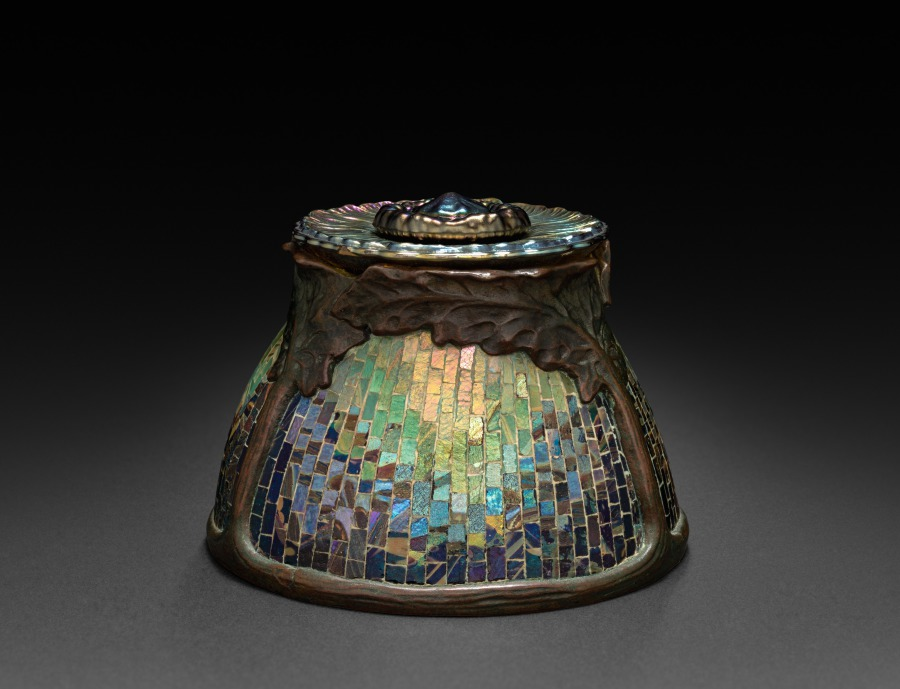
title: Poppy Inkwell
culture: America, New York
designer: attributed to Clara Wolcott Driscoll (American, 1861–1944)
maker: Tiffany Glass & Decorating Company (America, New York, 1892–1902)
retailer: Tiffany Studios (United States, New York, 1902–32)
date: c. 1898–1906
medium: favrile glass mosaic, bronze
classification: Glass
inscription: stamped on underside: 28289/Tiffany Studios/New York/TGDCo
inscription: engraved on underside of insert: L.C.T. Favrile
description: By 1900 Louis Comfort Tiffany had expanded his empire by increasing the firm’s production of “fancy goods,” including inkstands, candlesticks, clocks, small boxes, desk sets, tea screens, and other functional objects. Along with the array of artistic glass designs from his factory in Corona, Queens, works in ceramic, bronze, other metals, and even jewelry abounded. These smaller, more affordable luxury items were designed with as much thought to artistry as the great stained glass windows and lamps through which the firm enjoyed unrivaled success.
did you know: More than a thousand tiny pieces of glass form the mosaic design of this inkwell.